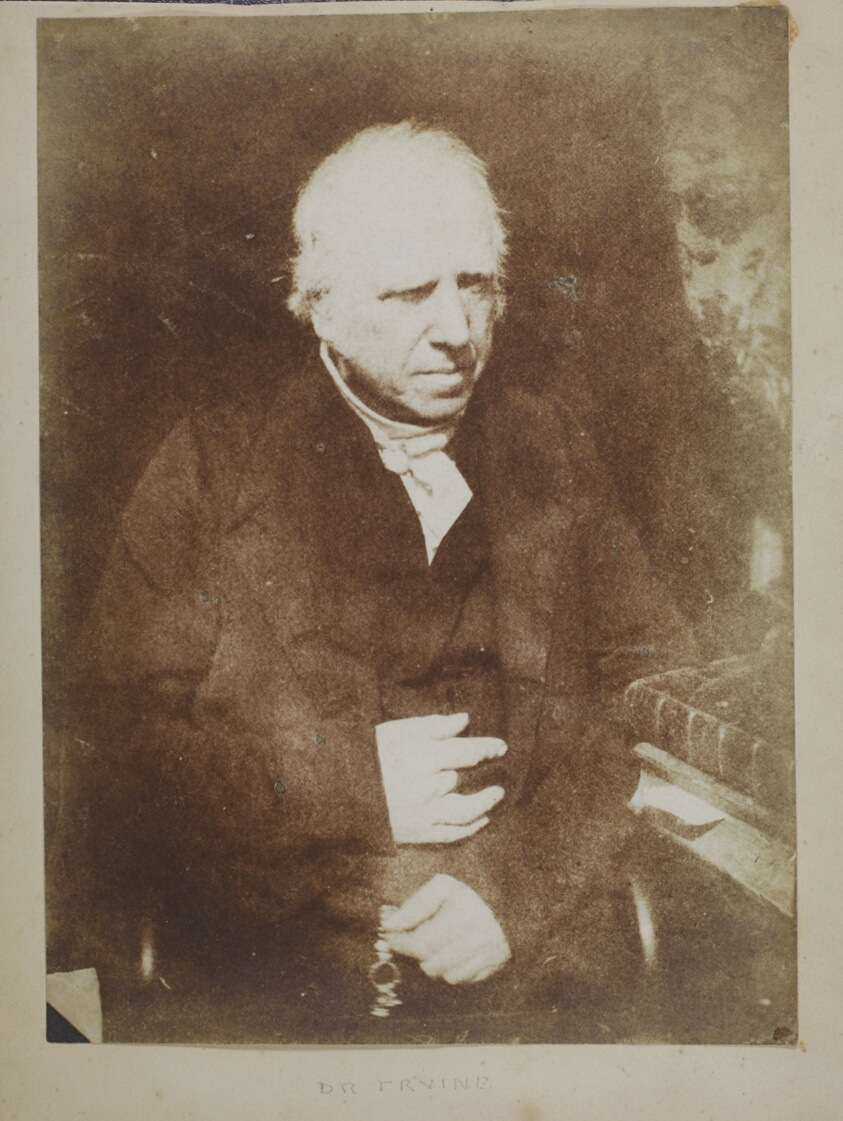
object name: Photograph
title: Dr. David Irving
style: 19th century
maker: David Octavius Hill (Scottish, 1802–1870) and; Robert Adamson (Scottish, 1821–1848)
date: 1843/47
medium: Calotype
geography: Scotland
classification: photograph; photography